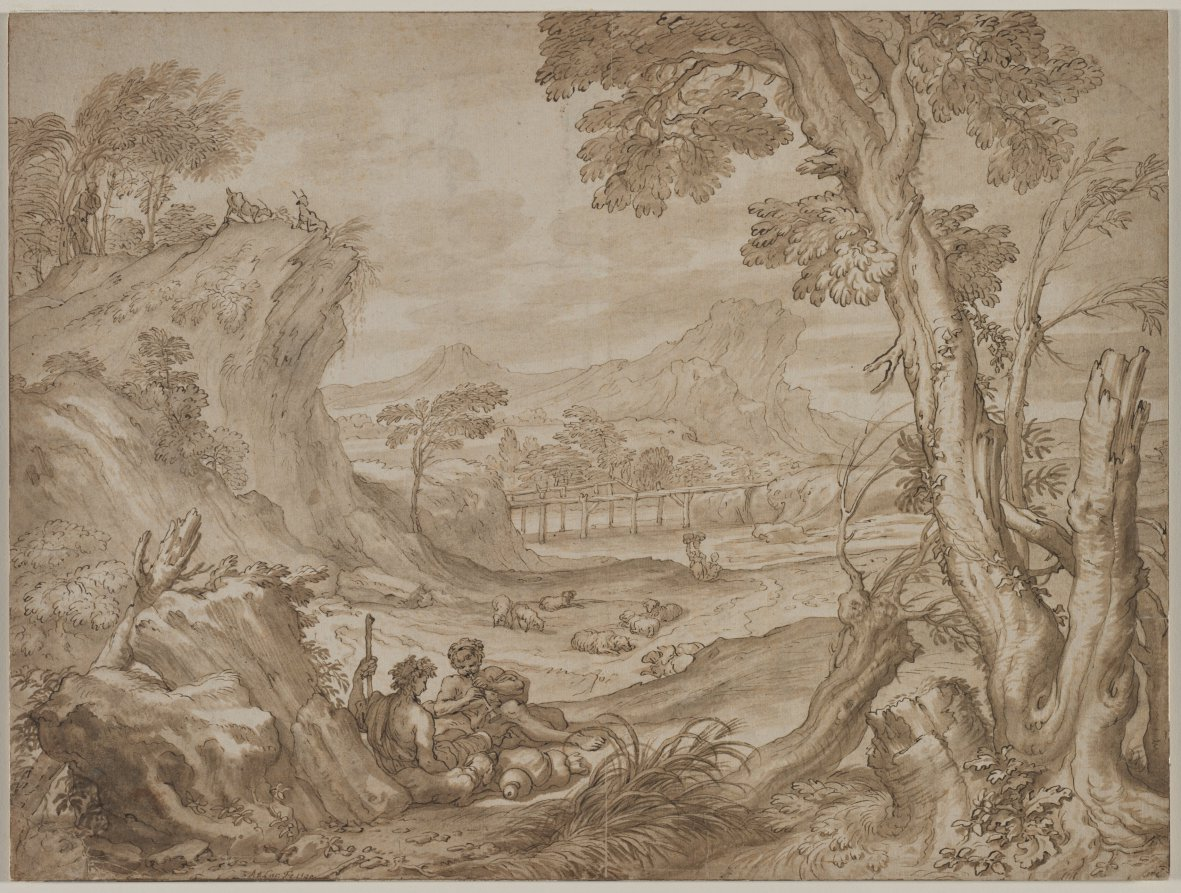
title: Landscape with Shepherds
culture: Italy, late 17th-early 18th Century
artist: Domenico I Piola (Italian, 1627–1703)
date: c. 1700?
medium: pen and brown ink and brush and brown wash over traces of black chalk; framing lines in brown ink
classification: Drawing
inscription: lower left, in brown ink: Ag. Car. Fe. 159[0?]. ; VERSO OF SECONDARY SUPPORT (printed page of a French festival book), lower center, in brown ink: Augustin Carrache / [illegible, cropped] ; lower center, in graphite: (Signé) / [illegible] ; lower right, in blue pencil: # 40